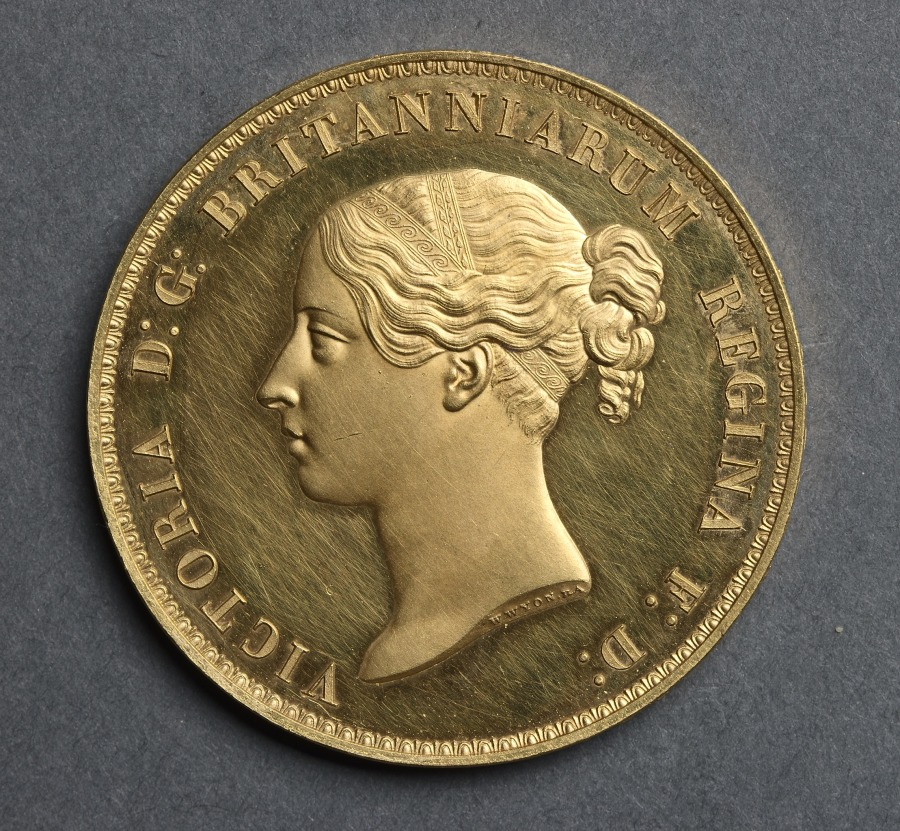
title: Five Pound Piece: Victoria (obverse); Una (reverse)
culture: England, Victoria, 1837-1901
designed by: William Wyon (British, 1795–1851)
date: 1839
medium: gold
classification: Coins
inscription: VICTORIA D: G: BRITANNIARUM REGINA F: D:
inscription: DIRIGE DEUS GRESSUS MEOS; MDCCCXXXIX; W. WYON R.A.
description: This piece was struck by the Royal Mint from gold purchased for the purpose. The current gold coins, such as the sovereign, were struck from gold supplied by the Bank of England. The larger gold pieces have their origins in the five and two guinea pieces. There are several minor varieties of this fine and rare piece, designed by William Wyon, R.A., a member of the celebrated family, still in existence, that had such a long and profound influence on British coin design. By some, this piece was considered to be too medallic for coinage purposes. Queen Victoria, at this date a young woman of 20, is shown as Una, Truth, because truth is one: one of the principal characters in Spenser's Faerie Queene (1590–1611). She is leading the lion referred to in her adventures in Spenser's work. It is often also referred to as the British lion. This coin is considered by many to be one of the most beautiful in the English series, and the standard of workmanship and striking has never been improved upon.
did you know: This five-pound piece was never for circulation but instead for presentation and collectors.